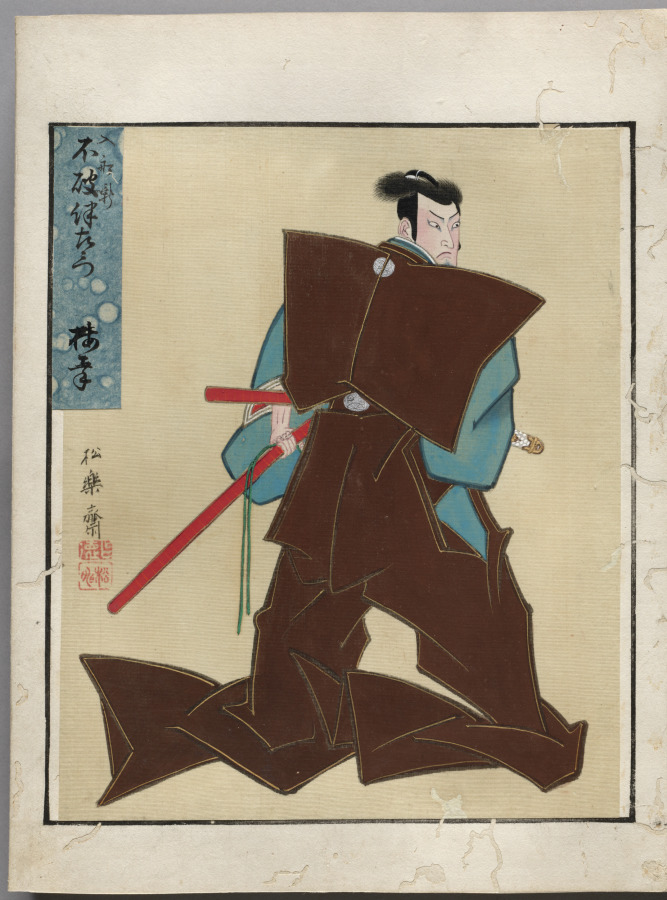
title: Double-Leaf from Album of Actor Portraits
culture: Japan, Edo period (1615–1868)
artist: Shōrakusai (Japanese)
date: c. 1790–1810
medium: double-leaf from an accordion-style album; ink on paper (right) and ink and color on silk (left)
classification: Bound Volume